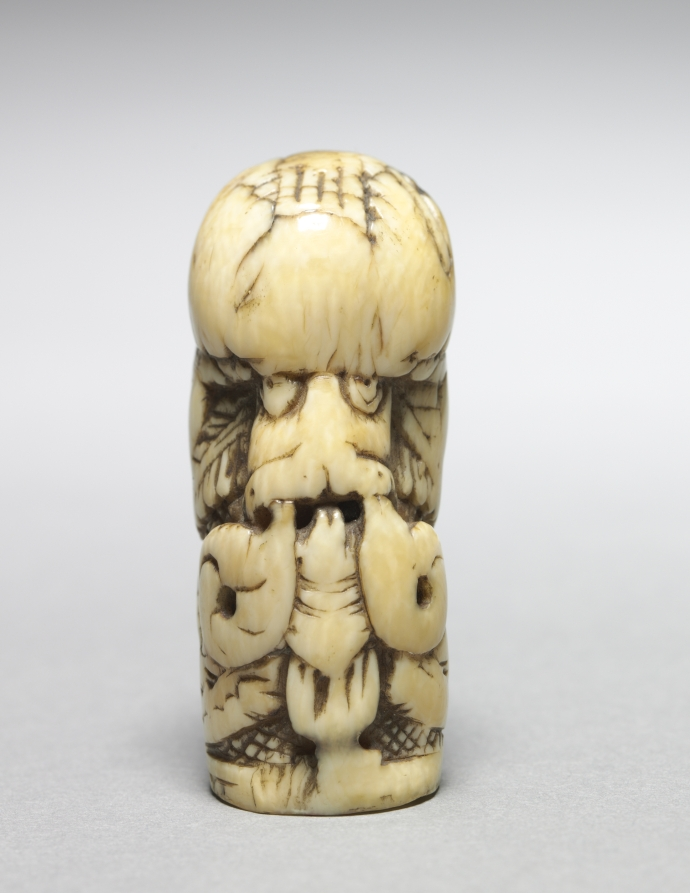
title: Dragon's Head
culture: Anglo-Norman?, Romanesque period, 12th century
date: 1100–1150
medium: walrus ivory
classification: Ivory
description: This exceedingly rare medieval carving, which recalls the more monumental carvings on Viking ship prows, may have been a finial for a diagonal member of a folding chair. The character of the head, the stylized acanthus leaves, and the foliage-spouting mask on the neck are characteristic of north European and Anglo-Norman Romanesque styles.